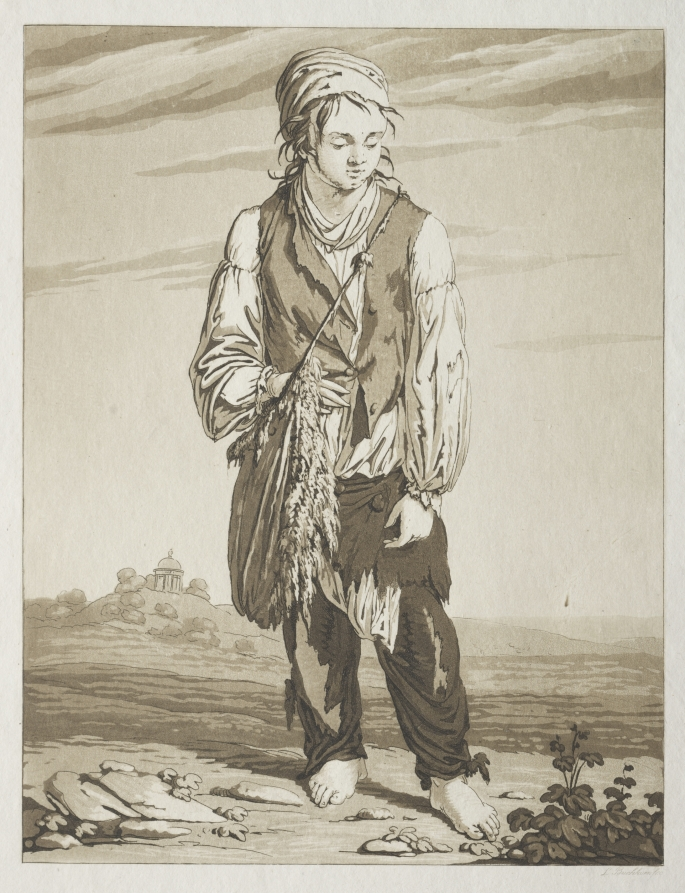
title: The Young Beggars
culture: Germany, late 18th-early 19th century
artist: Karl Ludwig Bernhard Buchhorn (German, 1770–1856)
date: c. 1800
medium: aquatint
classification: Print